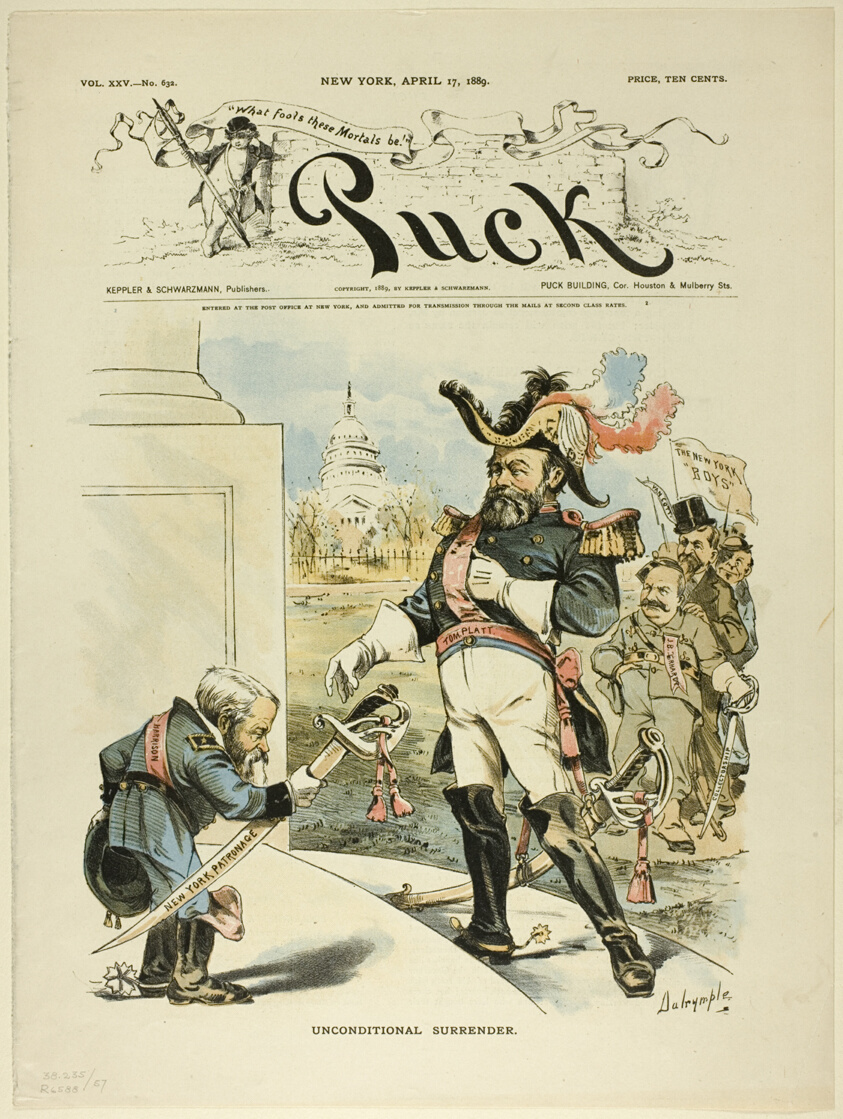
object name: Print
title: Unconditional Surrender, from Puck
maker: Louis Dalrymple (American, 1865-1905)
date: published April 17, 1889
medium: Color lithograph on newsprint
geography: United States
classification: lithograph; print; prints and drawing